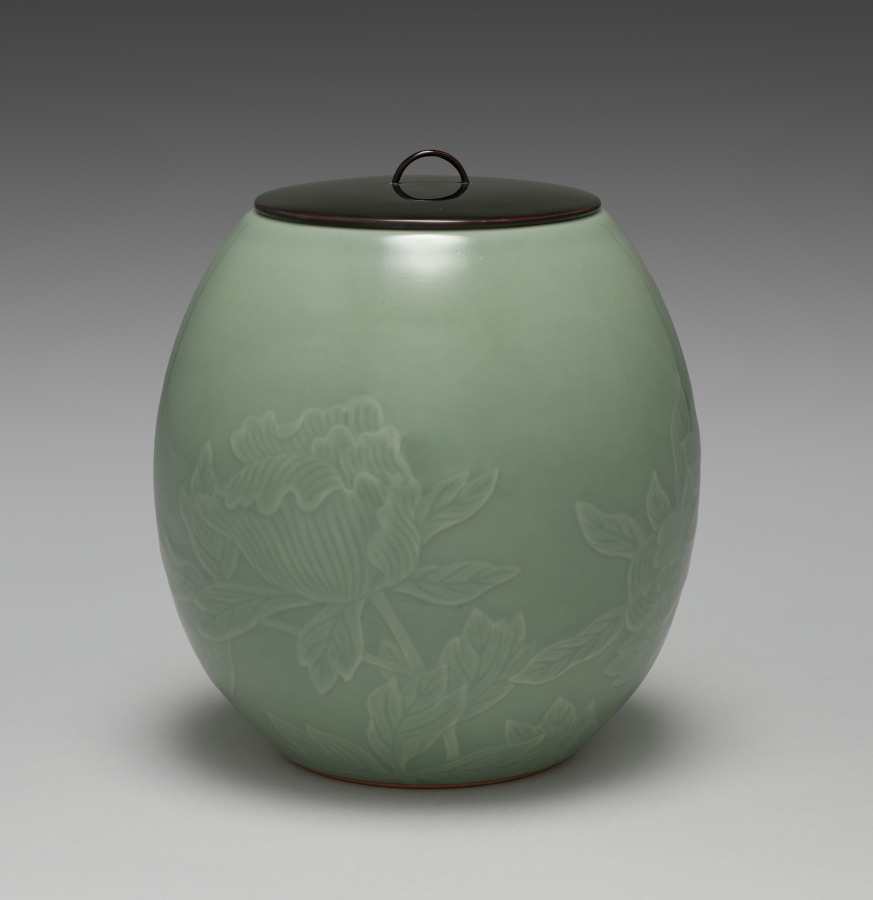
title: Water Container with Peonies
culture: Japan, Meiji period (1868–1912)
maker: Seifū Yohei III (Japanese, 1851–1914)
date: 1900–1914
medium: Porcelain with molded and carved design, green glaze, and black lacquered lid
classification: Ceramic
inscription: 清風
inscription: 帝室技芸員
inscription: 清風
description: This ceramic is an especially accomplished example of Yohei III’s combination of an allover translucent colored glaze with molded and carved designs. It features the peony as its primary motif. The water container, or mizusashi, has a green glaze, and its design takes into consideration the rounded shape and the seated position of the host and guests. It begins low on the body with a flower just beginning to open and continues with another flower a bit higher up, with its petals fully extended and beginning to open outward. It finishes with a flower in full bloom, petals and leaves unfurled and spread outward from the center, now occupying almost the entire surface. The water container once belonged to the Hosokawa family, whose go-between corresponded with Yohei IV about the piece. Yohei IV thanked them for their payment and requested that despite his father’s death in the previous year, they continue to favor the studio with their orders. The letter and its envelope, as well as an auction tag, remain with the object.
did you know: This water container may also serve as a site for cultural reckoning, as when the life cycle of a flower prized in East Asia as a symbol of wealth is displayed across a Japanese chanoyu vessel whose glaze is associated with the seats of power in China and Korea.